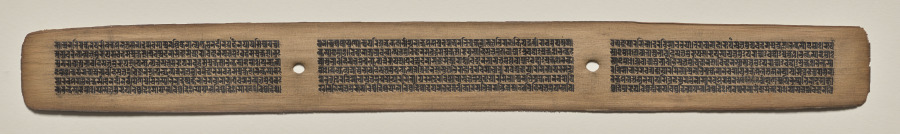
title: Text, Folio 66 (recto), from a Manuscript of the Perfection of Wisdom in Eight Thousand Lines (Ashtasahasrika Prajnaparamita-sutra)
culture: Eastern India, Bihar, Vikramashila Monastery. Painting: Nepal, Kathmandu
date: Sunday, September 14, 1119 (year 239 of the Newar Samvat in the month of Ashvina)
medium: gum tempera and ink on palm leaves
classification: Painting